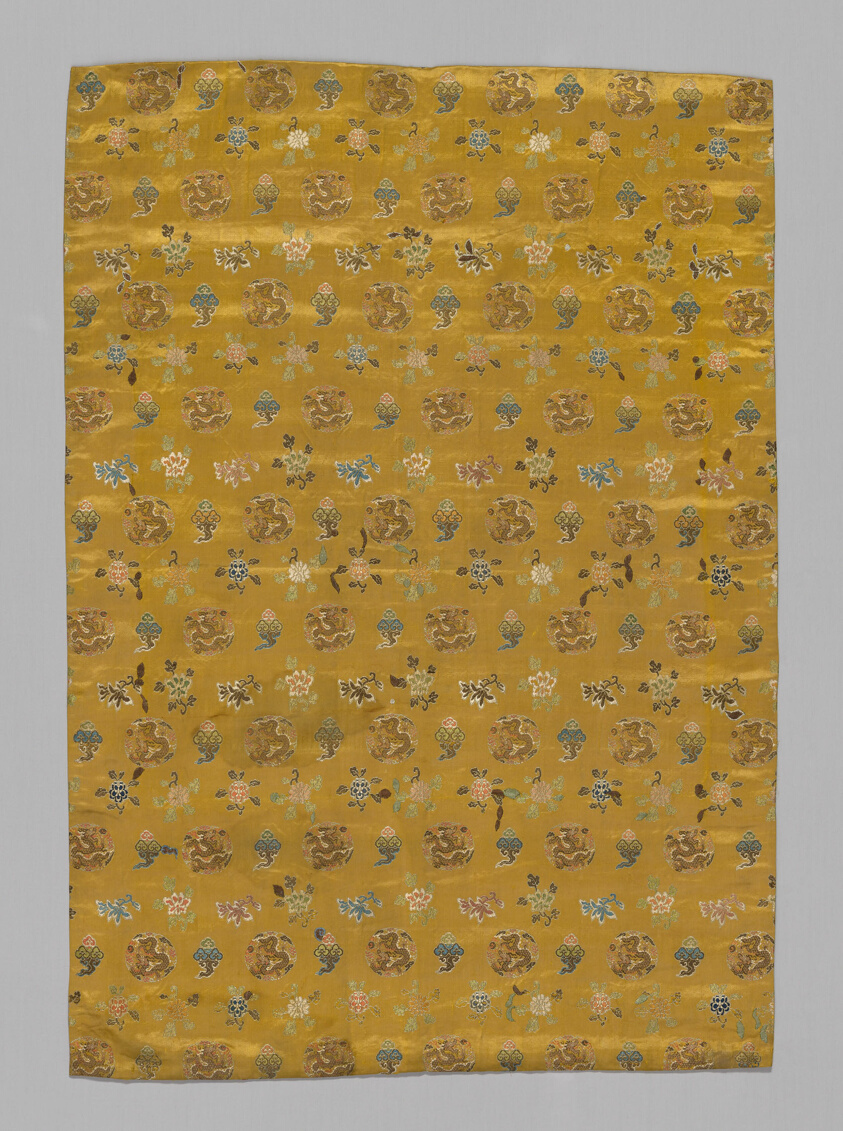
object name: Textile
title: Panel (Furnishing Fabric)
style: qing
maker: Manchu (China)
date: Qing dynasty(1644–1911), 1800/50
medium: Gold satin ground with embroidered dragon medallions, clouds and variety of floral forms in polychrome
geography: China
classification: textile; weaving; furnishing textile